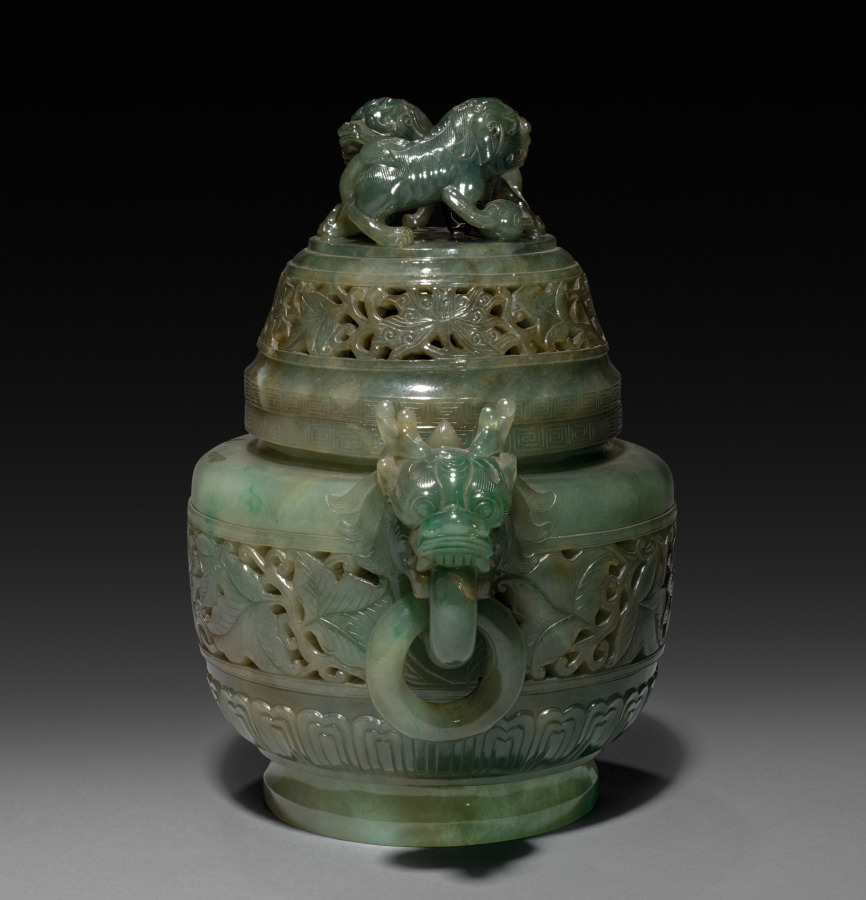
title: Koro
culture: China, Qing dynasty (1644–1911), Qianlong reign (1736–95)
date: 1736–95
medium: jade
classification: Jade